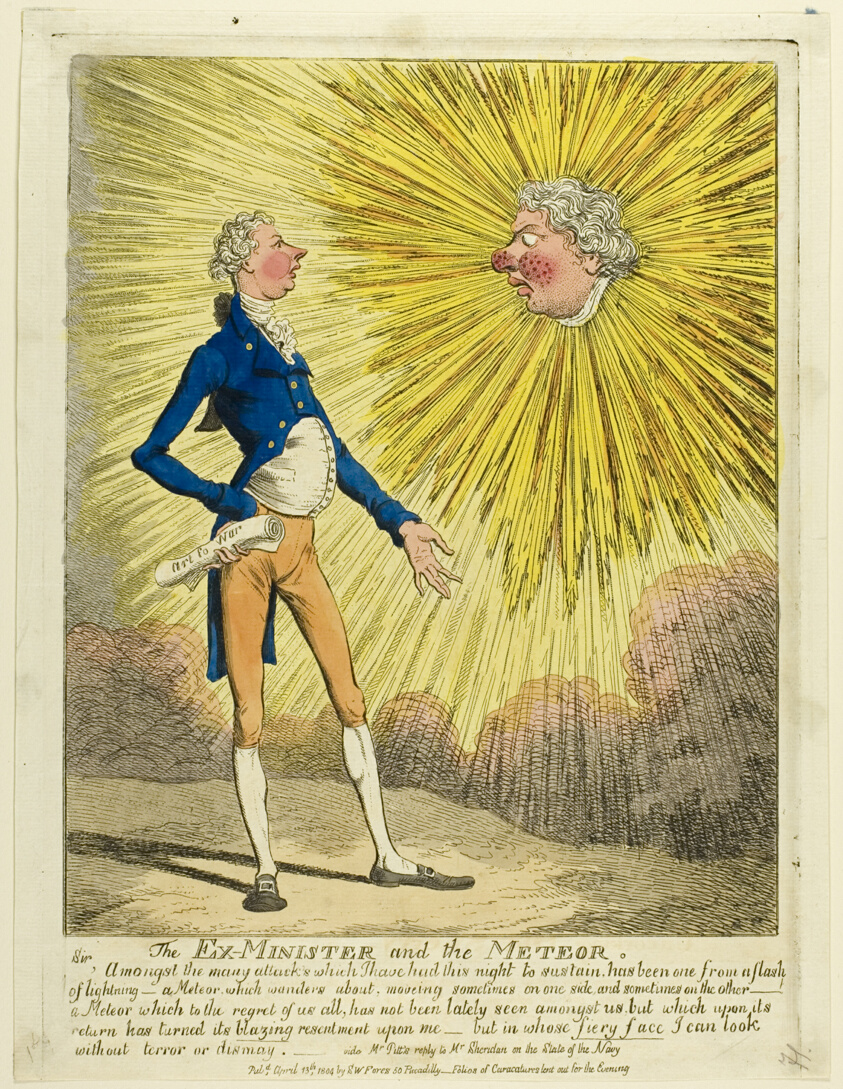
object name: Print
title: The Ex-Minister and the Meteor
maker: Charles WIlliams (English, active 1797-1830); published by S. W. Fores (English, active 1785-1825)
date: published April 13, 1804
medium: Hand-colored etching on ivory laid paper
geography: England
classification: etching; print; prints and drawing